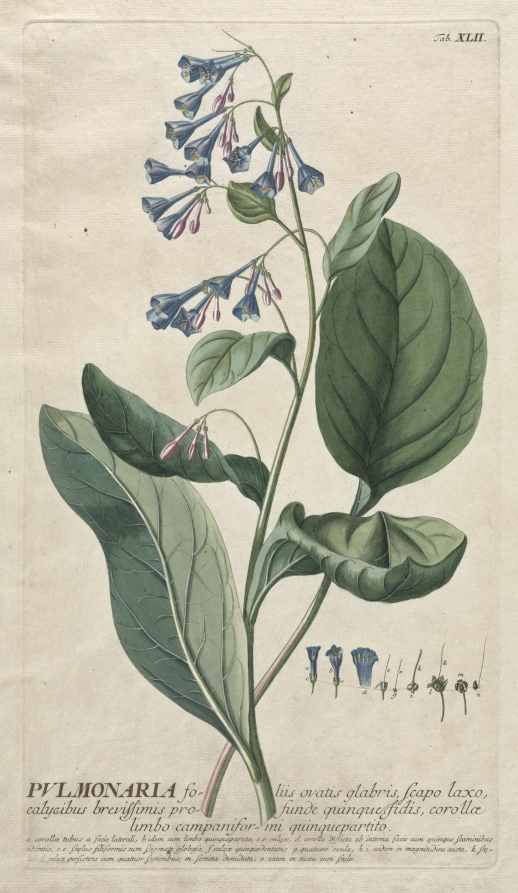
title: Plantae Selectae: No. 42 - Pulmonaria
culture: Germany, 18th century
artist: Georg Dionysius Ehret (German, 1708–1770)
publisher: Christopher Jacob Trew (German, 1695–1769)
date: published 1750–73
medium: engraving, hand-colored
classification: Print